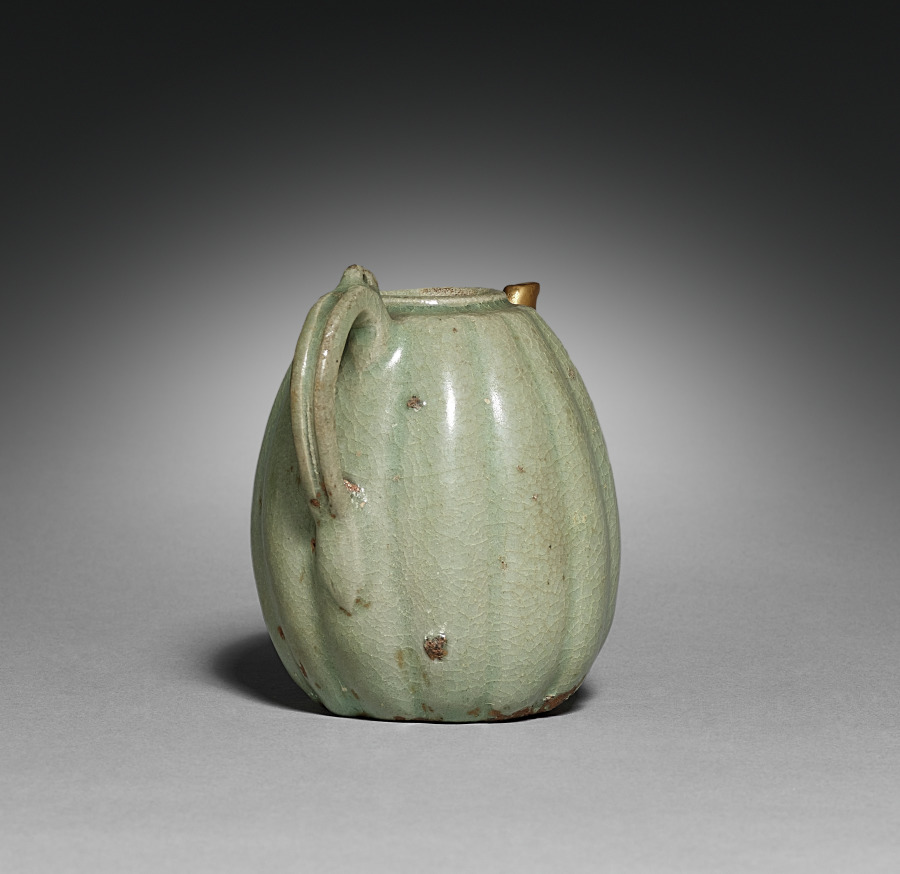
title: Melon-shaped Wine Ewer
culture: Korea, Goryeo dynasty (918–1392)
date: 1100s-1200s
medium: celadon ware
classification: Ceramic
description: Many celadon ceramics, such as these two miniature pots, have been repaired with gold lacquer. Termed kintsugi (literally meaning “gold joinery”) in Japanese, this restoration method highlights broken parts with glittering gold mixed with lacquer. Initiated in 15th-century Japan, the technique follows a popular aesthetic concept called wabi-sabi, which finds beauty in imperfect things. Goryeo celadons were considered rare treasures among early 20th-century Japanese collectors; thus, their broken condition is brilliantly highlighted in gold lacquer, as seen here in the repaired spouts, handle, and lid.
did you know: This miniature wine pot was buried in a tomb for the soul of the deceased.